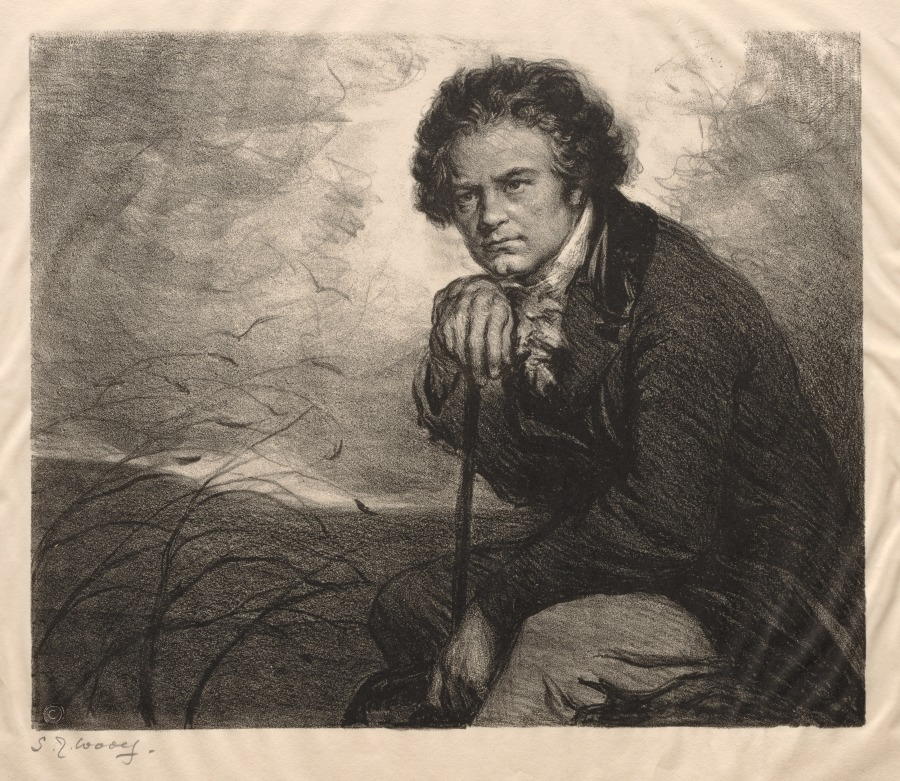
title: Beethoven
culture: America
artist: Samuel Johnson Woolf (American, 1880–1948)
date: c. 1920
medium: lithograph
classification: Print